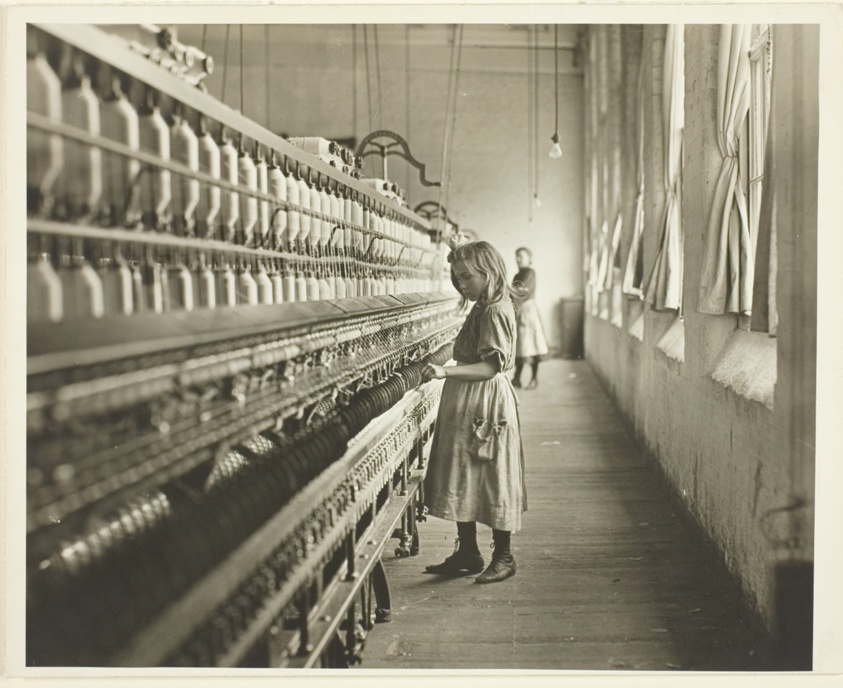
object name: Photograph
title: Sadie Pfeifer, a Cotton Mill Spinner, Lancaster, South Carolina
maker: Lewis Wickes Hine (American, 1874–1940)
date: 1908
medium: Gelatin silver print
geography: United States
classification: gelatin silver (developing-out-paper) pr; photographic process; photography; photograph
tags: Collected by Hugh Edwards